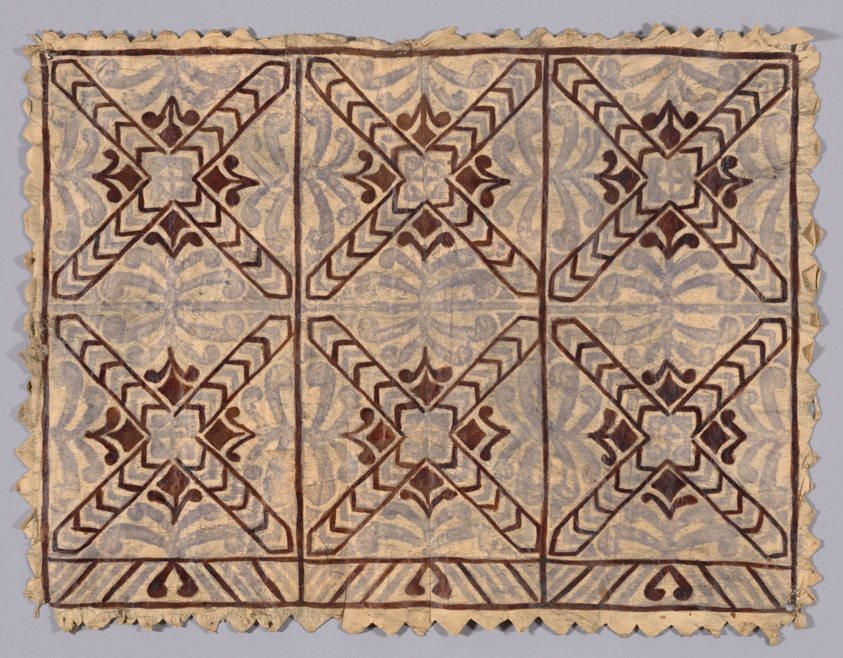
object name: Textile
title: Tapa Cloth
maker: Pacific Islands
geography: Pacific Islands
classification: textile; weaving